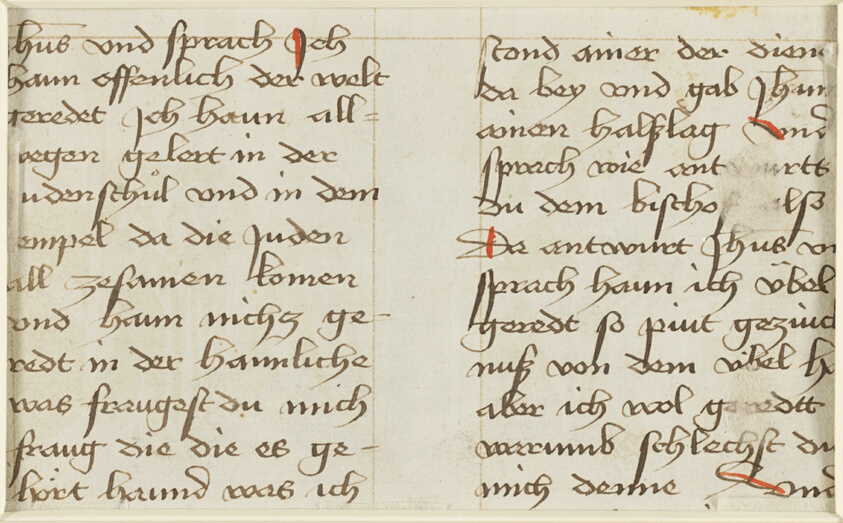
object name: Drawing and Watercolor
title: Christ before the High Priest Annas, from a Plenarium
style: medieval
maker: German Painter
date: about 1470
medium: Pen and brown ink and watercolor (recto) and pen and brown ink, with brush and red opaque watercolor (verso), on cream laid paper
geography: Germany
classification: watercolor; manuscript; prints and drawing; paper